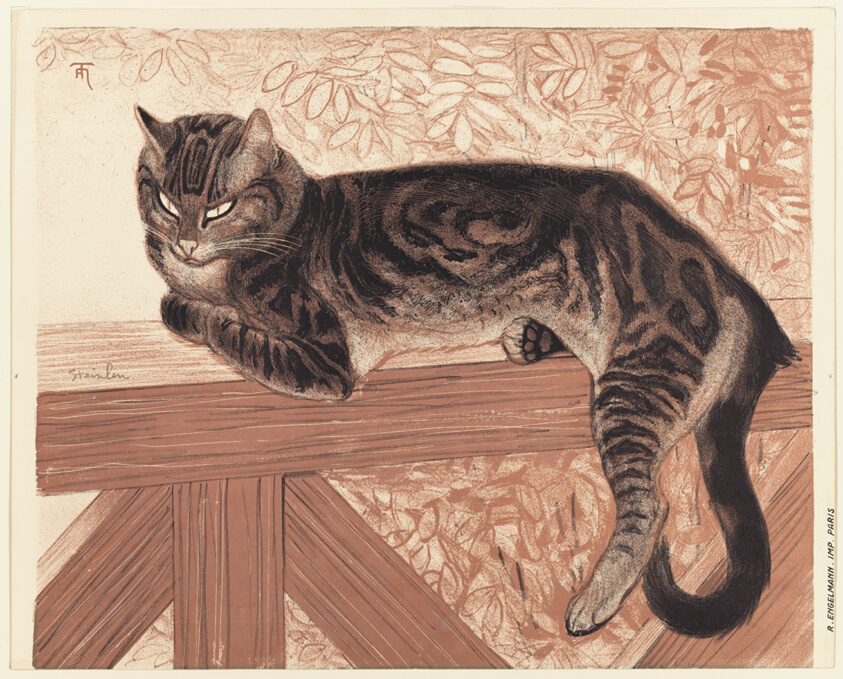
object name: Print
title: Summer: Cat on a Balustrade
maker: Théophile-Alexandre Steinlen; French, born Switzerland, 1859-1923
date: 1909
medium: Lithograph (brush, crayon and spatter with scraper) in pink/mauve, violet black and brown on cream wove paper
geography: France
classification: lithograph; print; prints and drawing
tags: cats, animals